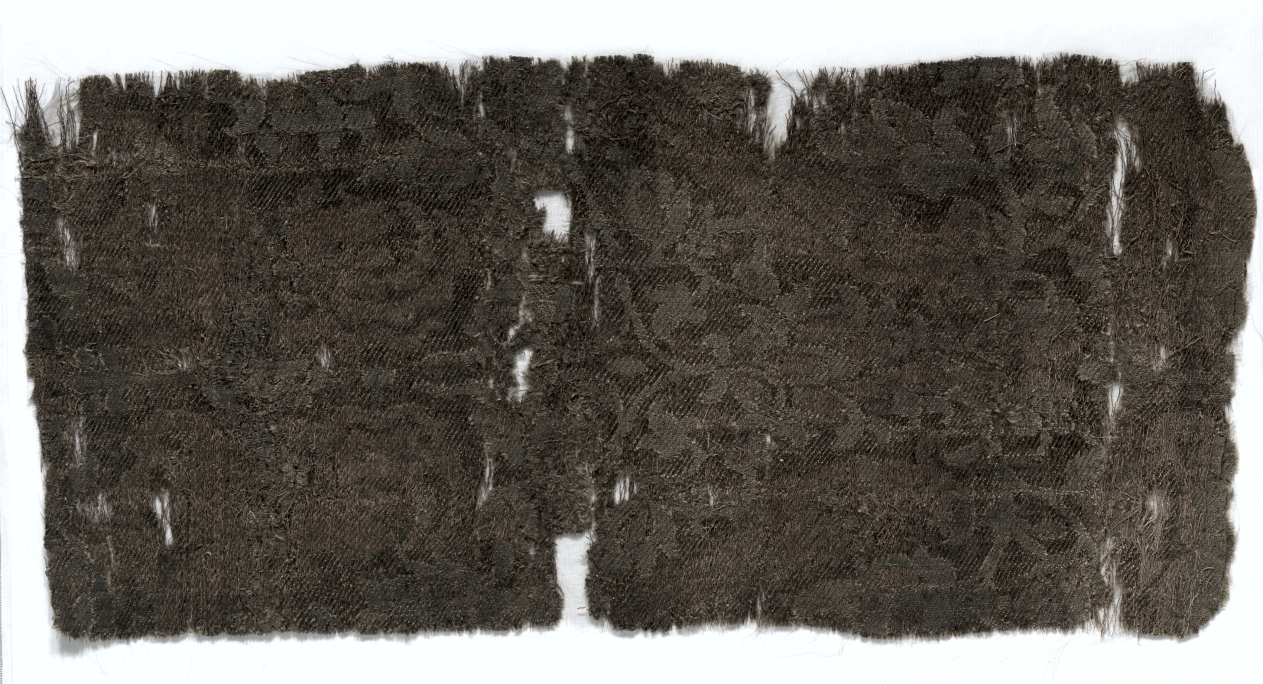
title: Silk Fragment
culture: Italy, mid or second half of 14th century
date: 1350–1399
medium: lampas weave; silk and silver thread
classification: Textile